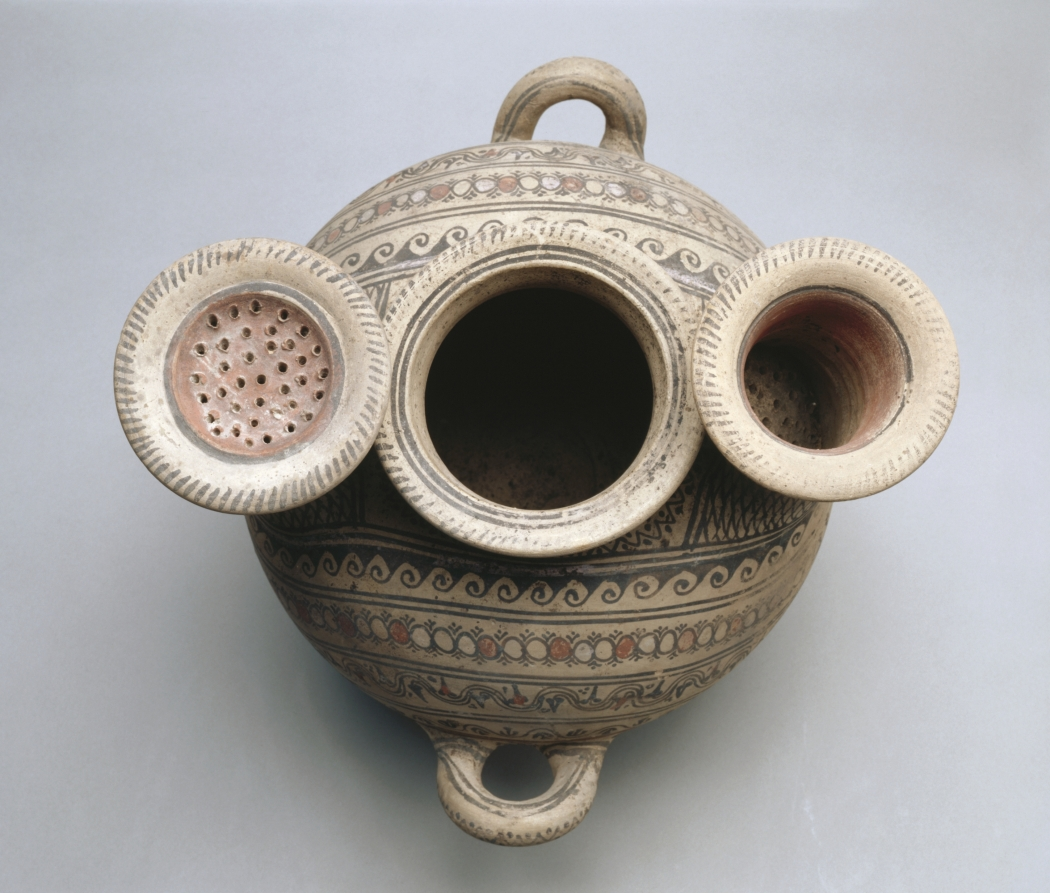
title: Two-Spouted Strainer Askos (Flask) with Lid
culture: South Italian, Daunian or Canosan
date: 300–200 BCE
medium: ceramic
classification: Ceramic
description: Although now referred to by the Greek term askos, because of its resemblance to the animal skins used to hold wine in ancient Greece, this ceramic shape developed in the South Italian region of Daunia (north of Apulia, on the Adriatic coast). This example is unusual for its three openings—one covered by a lid, the others spouted with built-in strainers. Its profusely painted decoration, mostly geometric and vegetal patterns applied in black with added red and white, is arranged in bands that follow the contours of the vessel.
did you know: Each spout has a built-in strainer—one near the top, the other near the bottom.